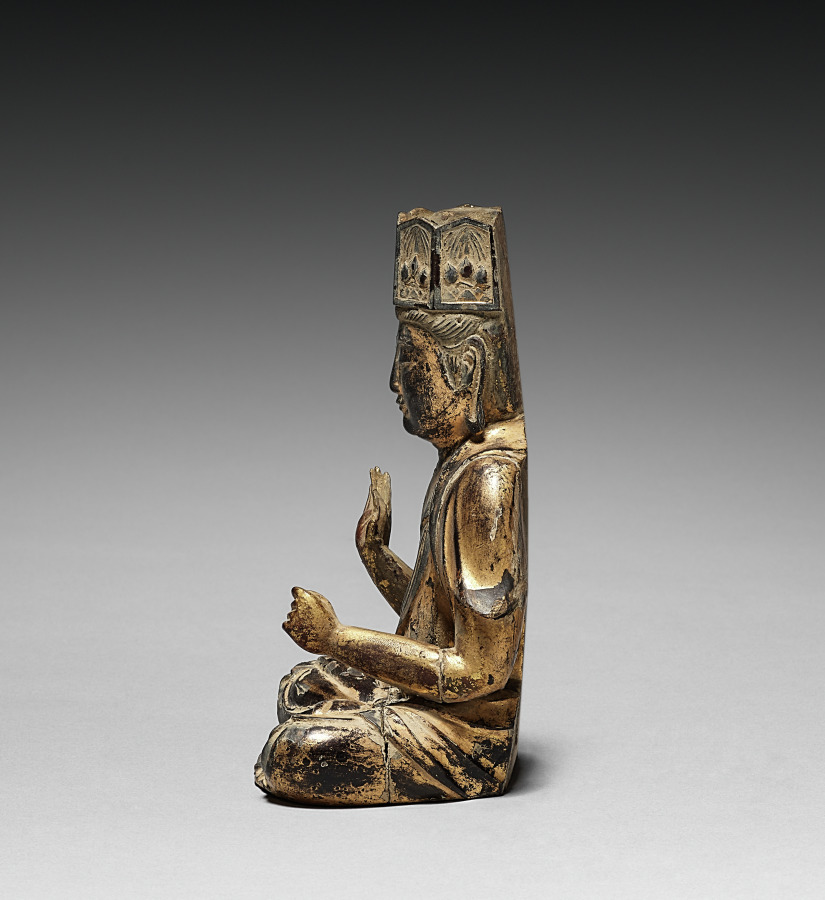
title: Bodhisattva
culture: Japan, Heian period (794–1185)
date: 900s-1100s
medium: gilded wood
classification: Sculpture